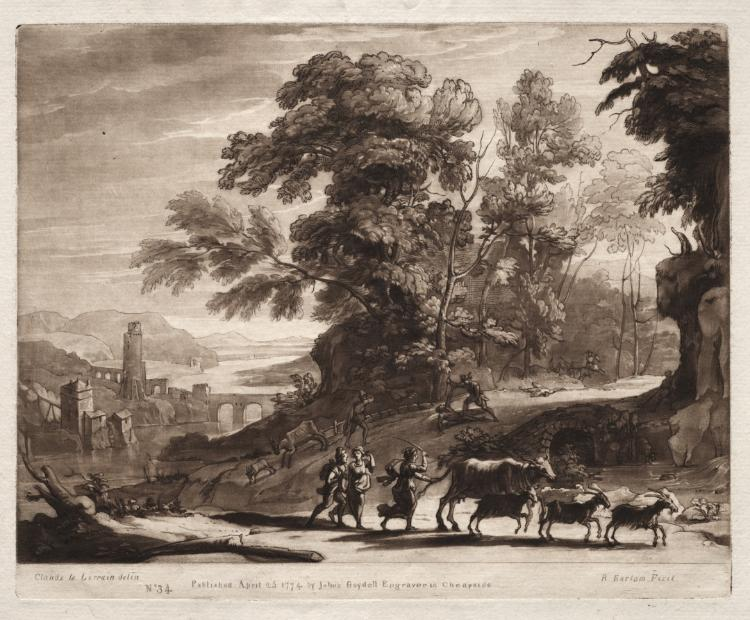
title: Liber Veritatis: No. 34, Peasants with Cattle attacked by Bandits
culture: England, 18th century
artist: Richard Earlom (British, 1743–1822)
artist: after Claude Lorrain (French, 1604–1682)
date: 1774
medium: etching and mezzotint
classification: Print